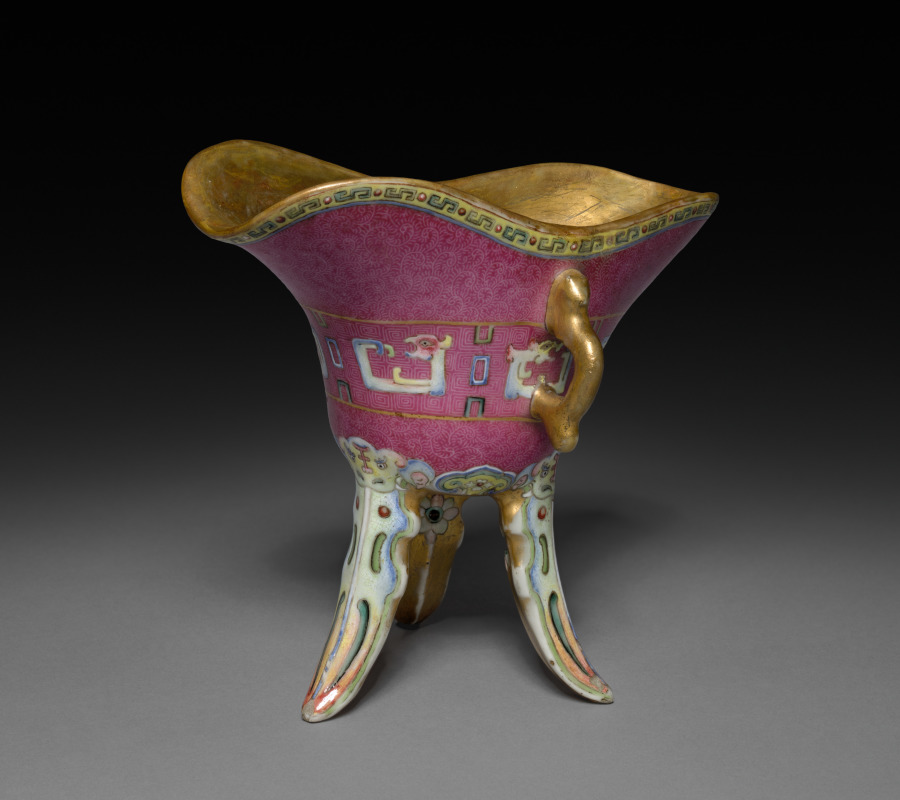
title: Libation Cup of Bronze Format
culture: China, Qing dynasty (1644-1911)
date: 1800s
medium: porcelain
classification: Ceramic